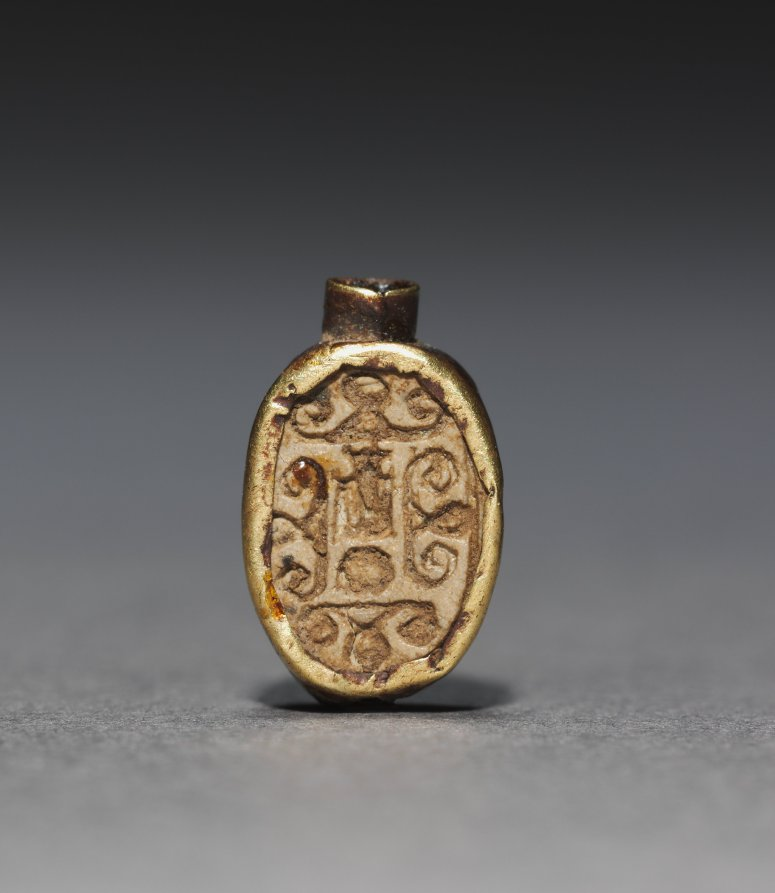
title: Scarab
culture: Egypt, New Kingdom (1540–1069 BCE)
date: 1540–1069 BCE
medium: steatite and gold, originally glazed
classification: Scarabs